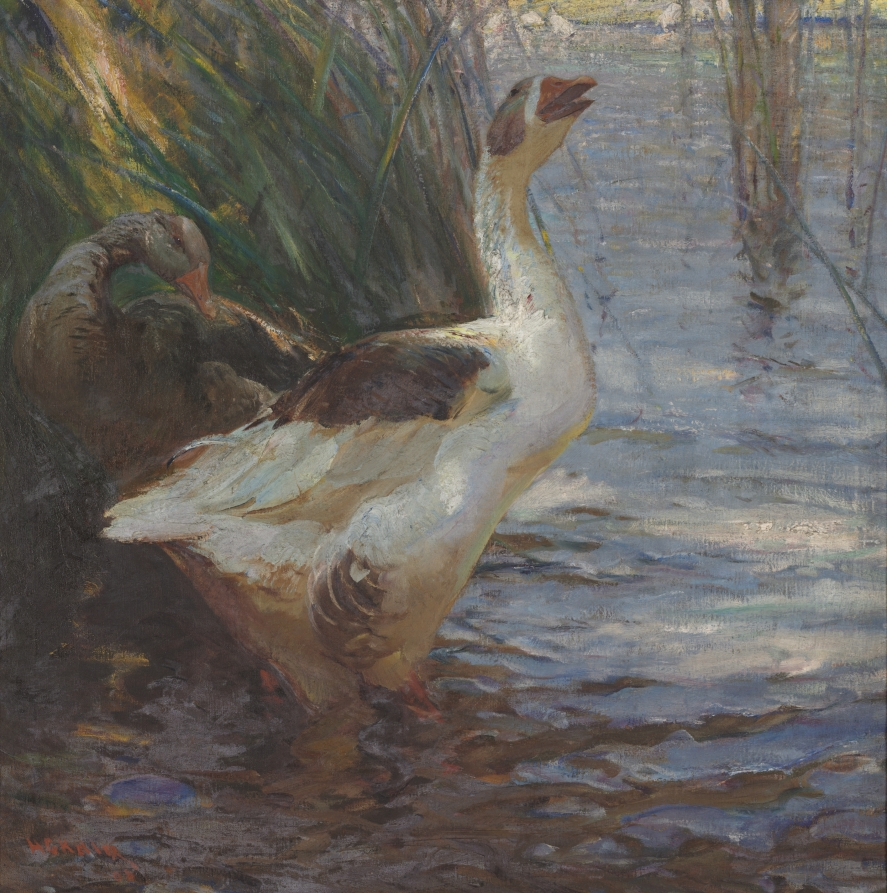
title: Disturbed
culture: America, Ohio, Cleveland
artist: Henry Keller (American, born Germany, 1869–1949)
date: 1908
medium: oil on canvas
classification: Painting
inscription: signed lower left: H. G. Keller, 08.